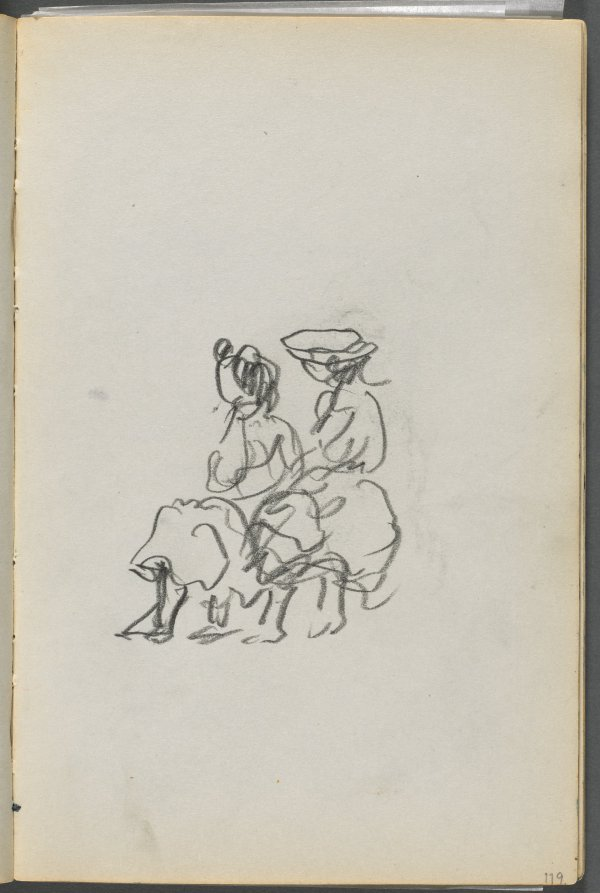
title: Sketchbook, The Dells, N° 127, page 119: Two Seated Figures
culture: America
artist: Maurice Prendergast (American, born Newfoundland [now Canada], 1858–1924)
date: c. 1919–1921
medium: graphite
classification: Bound Volume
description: This sketchbook contains 59 pages of graphite drawings and 16 watercolors made at various locations on Cape Ann, Massachusetts.